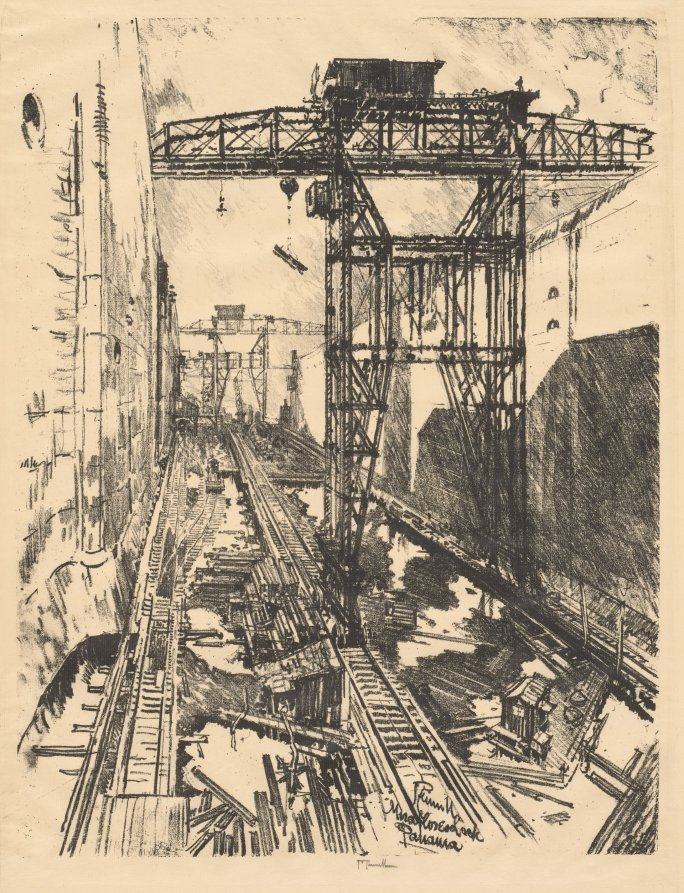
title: Cranes at Miraflores Lock, Panama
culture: America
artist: Joseph Pennell (American, 1857–1926)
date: 1912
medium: lithograph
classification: Print